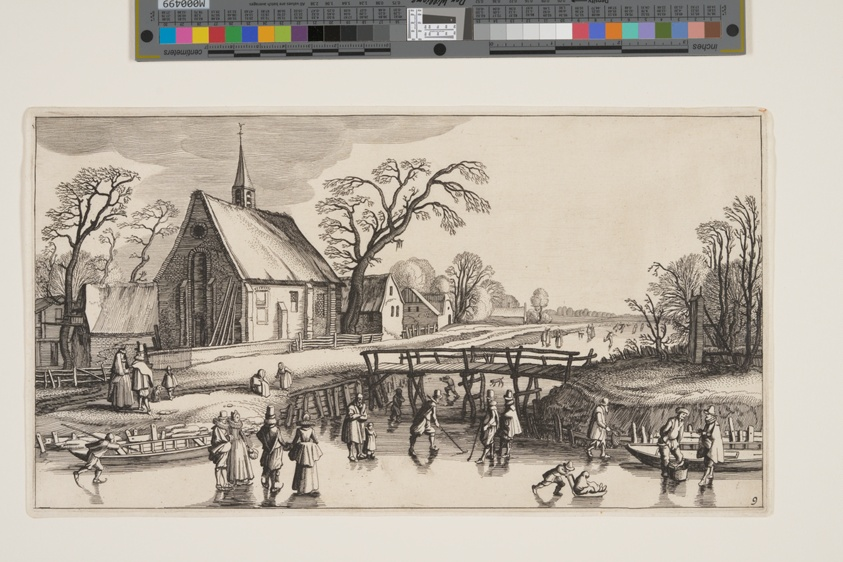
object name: Print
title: Winter Landscape, from Landscapes (Playsante Lantschappen)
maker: Attributed to Claes Jansz. Visscher II (Dutch, 1586-1652); after Jan van de Velde II (Dutch, c. 1593-1641)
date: c. 1641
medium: Etching, with engraving, on ivory laid paper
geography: Netherlands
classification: etching; paper; print; prints and drawing